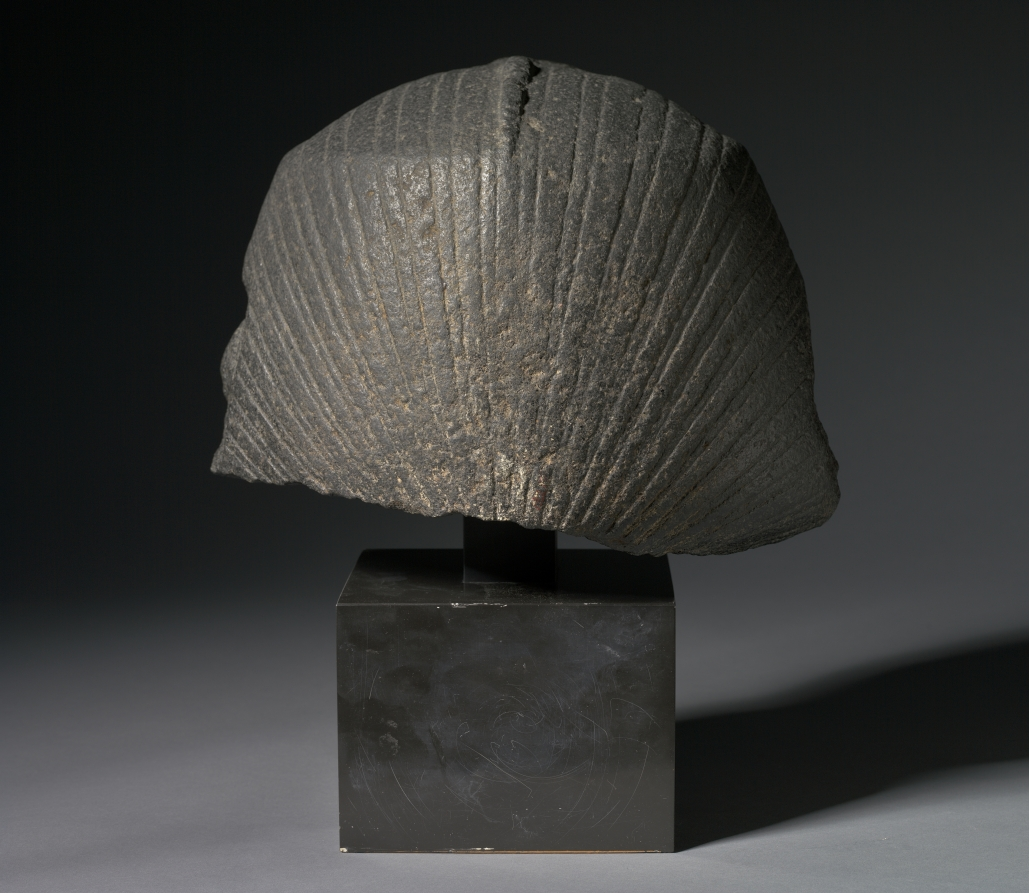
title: Head of a King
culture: Egypt, Third Intermediate (1069–715 BCE), Dynasties 21–22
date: c. 1069–715 BCE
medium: granodiorite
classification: Sculpture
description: This head was the first Egyptian royal sculpture to enter the museum. Although regal in appearance, the rather generalized facial features are not indicative of any specific ruler. It appears to be a work of the Third Intermediate Period, when artists drew inspiration from the elegant, idealizing style of the 18th Dynasty.